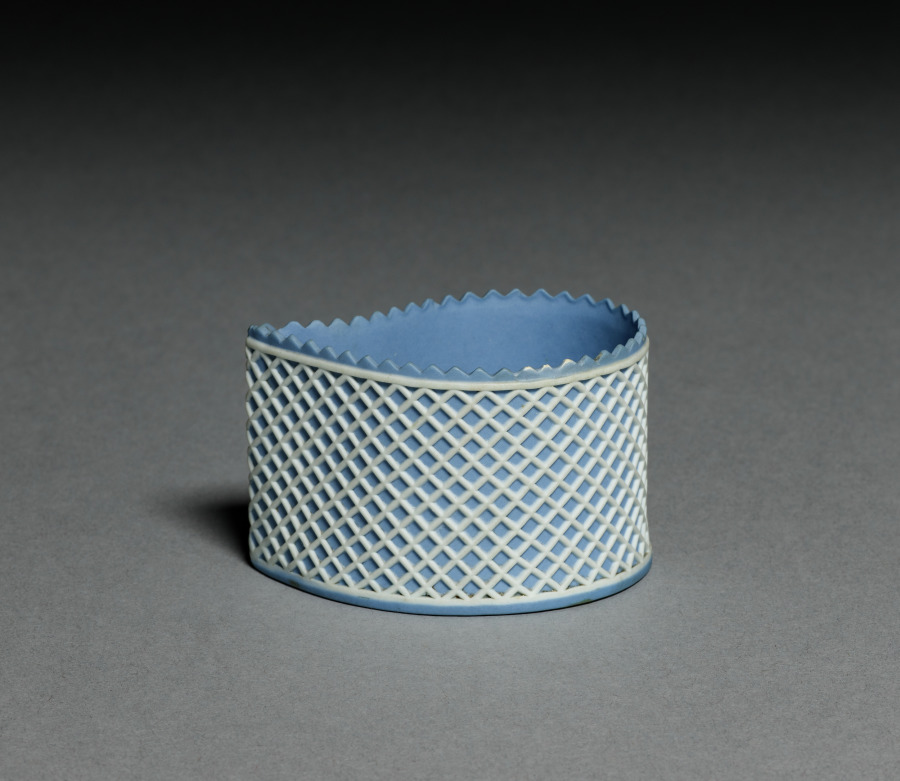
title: Custard Cup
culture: England, Staffordshire, 18th century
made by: Wedgwood Factory (British)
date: c. 1785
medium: jasper ware with relief decoration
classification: Ceramic